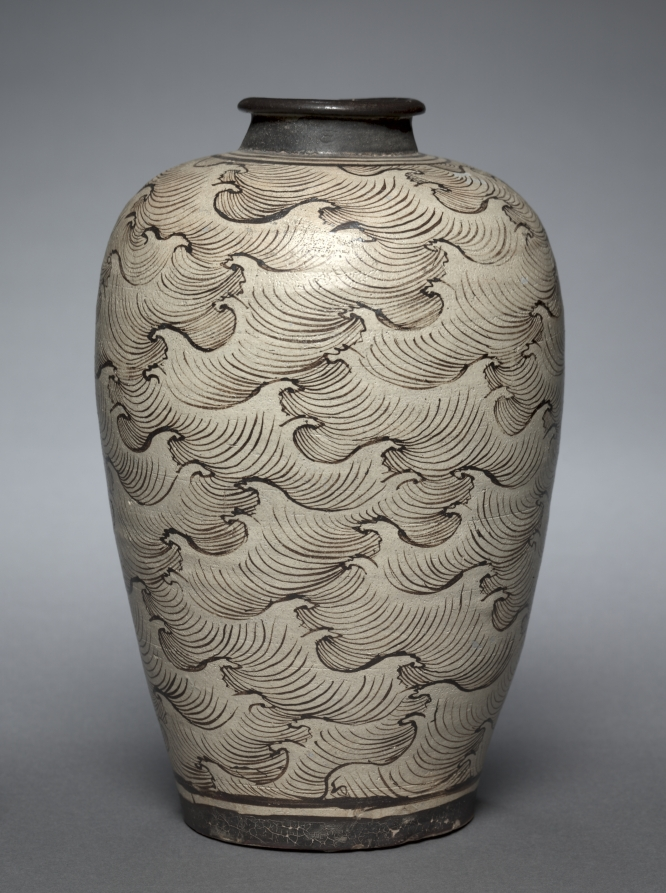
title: Vase (Meiping) with Waves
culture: China, Jiangxi Province, Yonghezhen, Yuan dynasty (1271–1368)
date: 1200s–1300s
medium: glazed stoneware with slip painted decoration, Jizhou ware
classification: Ceramic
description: Jizhou ware kilns in central Jiangxi province produced a dark ware in competition with other kilns in China and so Jizhou potters were highly inventive. Part of their work is a ware covered with a white slip over which they painted bold graphic designs of great visual effect. This striking wave design is remarkable in the way the painter transformed the entire surface of the vase into dynamically rolling masses of water, highlighted by cresting waves. Jizhou wares were excavated in cities of the lower Yangzi delta, including Nanjing, Shanghai, Changzhou, Taizhou, as well as Anhui province, Korea, and Japan.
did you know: When Jizhou ware is fired, the slip coating and the inlaid decoration assume a soft ivory color while the exposed clay body displays a warm cinnamon brown.